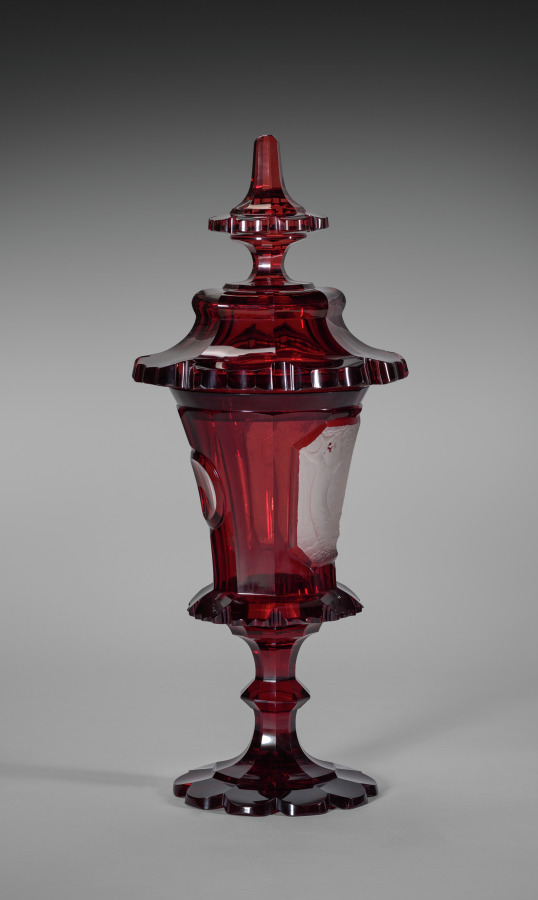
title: Covered Cup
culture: Bohemia, 19th century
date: mid-1800s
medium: ruby glass with engraved decoration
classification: Glass